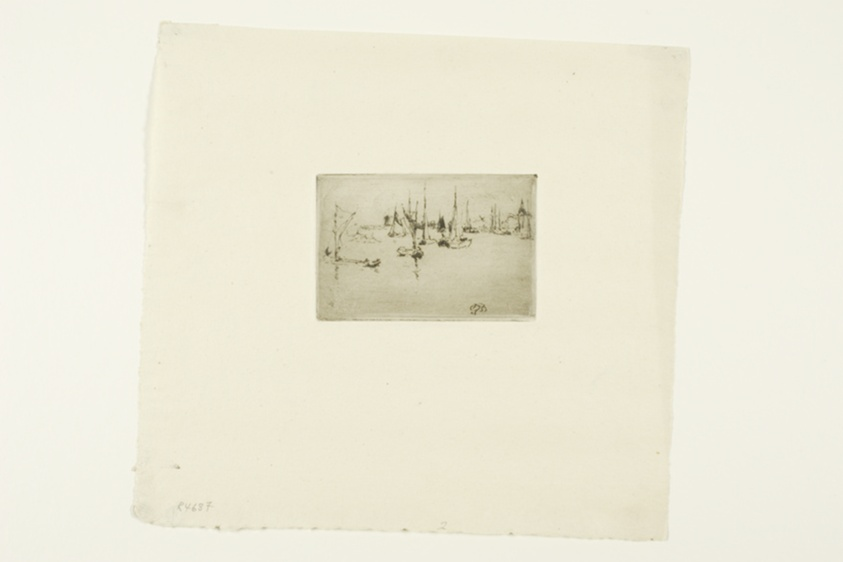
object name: Print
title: Barges, Dordrecht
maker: James McNeill Whistler (American, 1834-1903)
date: 1886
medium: Etching in black ink on cream laid paper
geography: United States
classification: etching; print; prints and drawing; paper